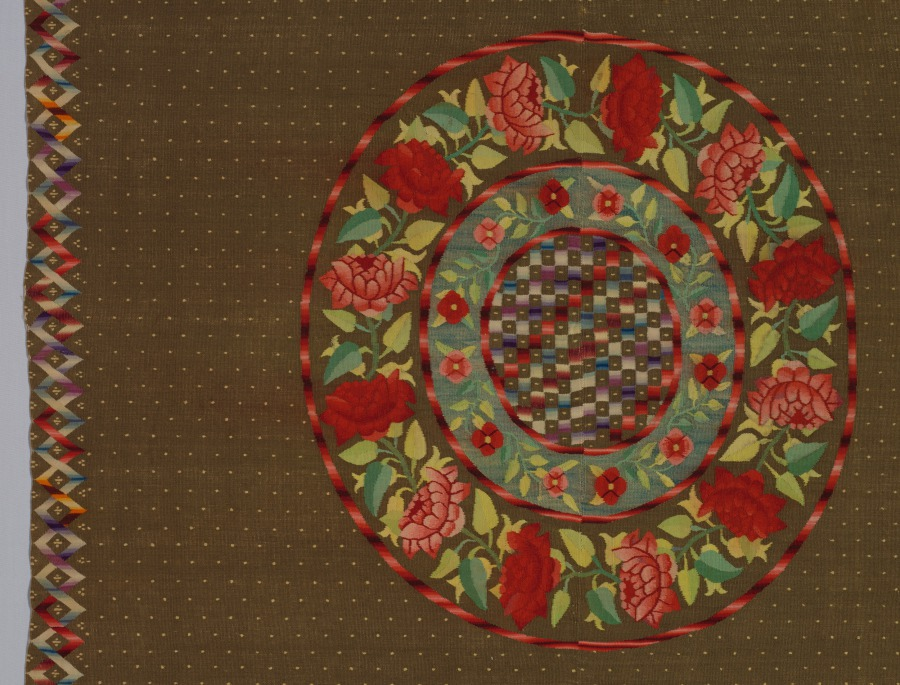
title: Sarape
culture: America, Native North American, Southwest, Mexico, Saltillo, Post-Contact, Transitional Period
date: c. 1870–1890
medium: tapestry weave: cotton and wool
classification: Textile